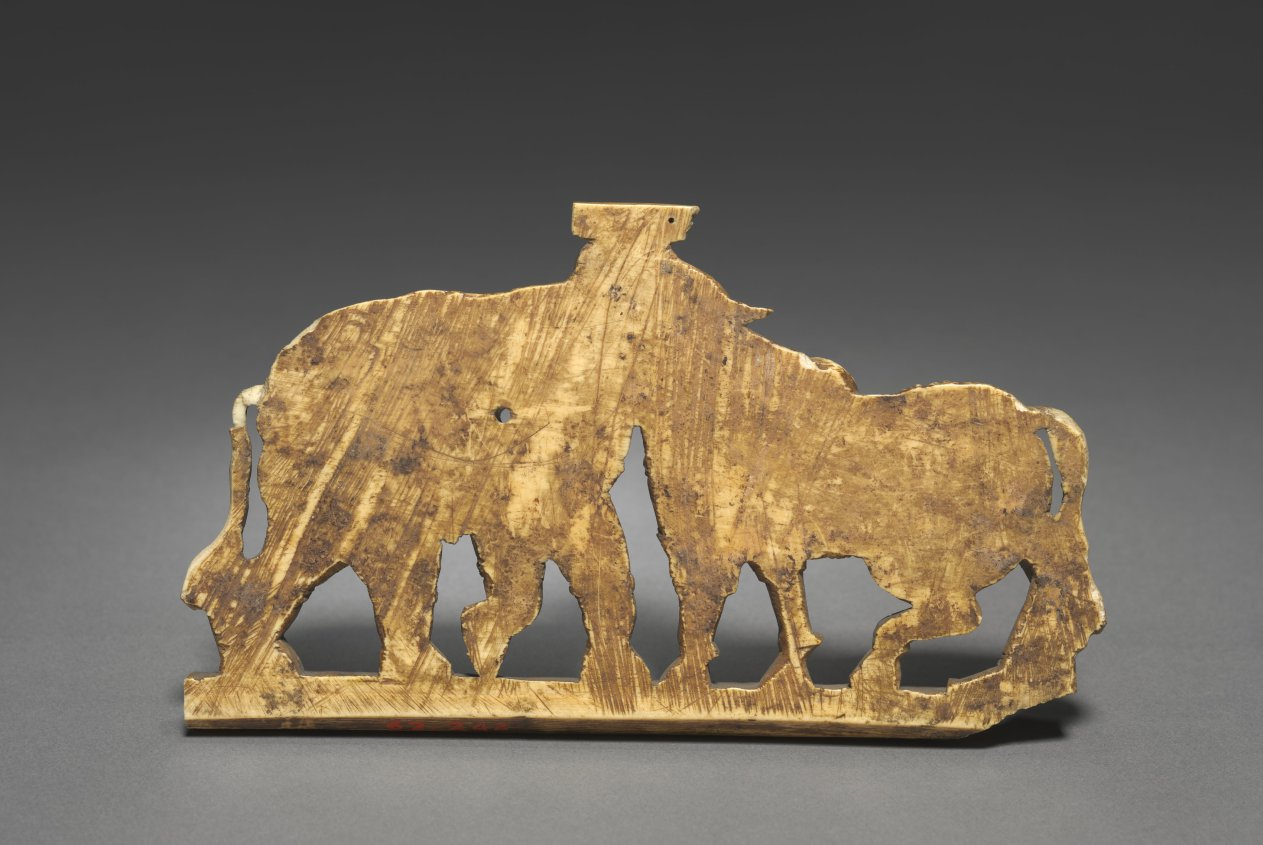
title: Bull and Elephant in Combat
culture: South India or Ceylon, 16th-17th century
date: 1500s-1600s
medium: ivory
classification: Ivory